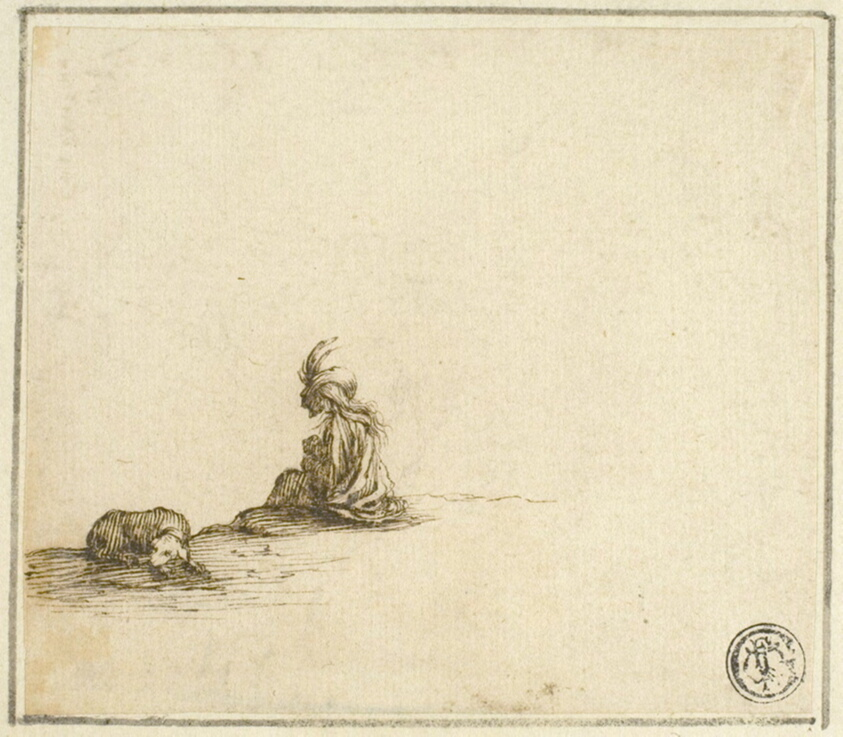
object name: Drawing and Watercolor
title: Seated Gypsy Mother and Child, with Dog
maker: Attributed to Stefano della Bella (Italian, 1610-1664); or after Jacques Callot (French, 1592-1635)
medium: Pen and brown ink, on ivory laid paper, laid down on cream laid paper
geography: Italy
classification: pen and ink drawings; drawings (visual works); prints and drawing